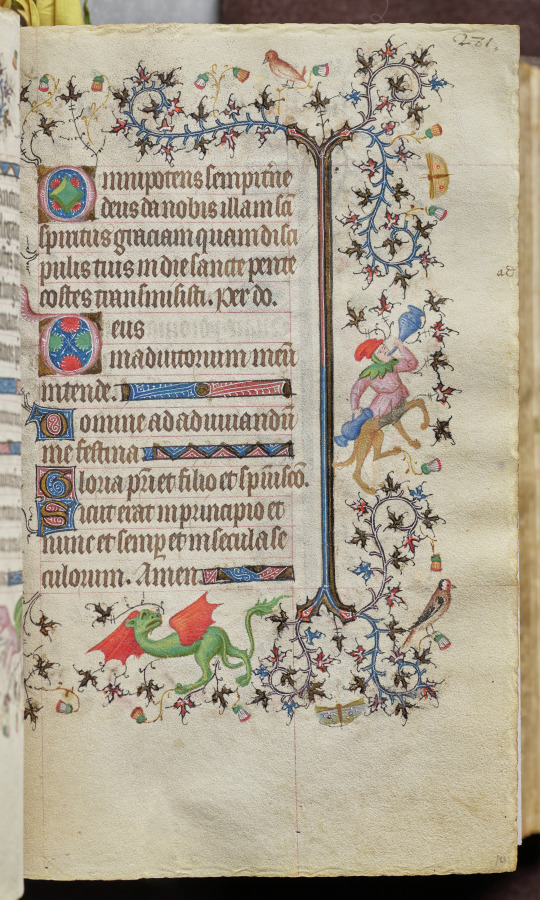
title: Hours of Charles the Noble, King of Navarre (1361-1425): fol. 141r, Text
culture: France, Paris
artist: Master of the Brussels Initials and Associates (French)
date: c. 1405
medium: ink, tempera, and gold on vellum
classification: Bound Volume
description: This precious volume was obviously highly prized by its owner, the French-born King of Navarre, who had his coat of arms painted on no less than twenty folios. Rather than directly commissioning this manuscript from a specific workshop, it seems that Charles the Noble acquired his book of hours -- perhaps ready-made for the luxury market -- while on a trip to Paris in 1404-05. A collaborative effort, six painting styles are evidenced within the pages of this codex, those of two Italians, two Frenchmen, and two Netherlanders. The painter who was responsible for the planning and decoration of the book, and who produced seventeen of the large miniatures, was a Bolognese artist known as the Master of the Brussels Initials. His principal assistant, responsible for most of the borders, was a Florentine who signed his name "Zecho" da Firenze on folio 208 verso.